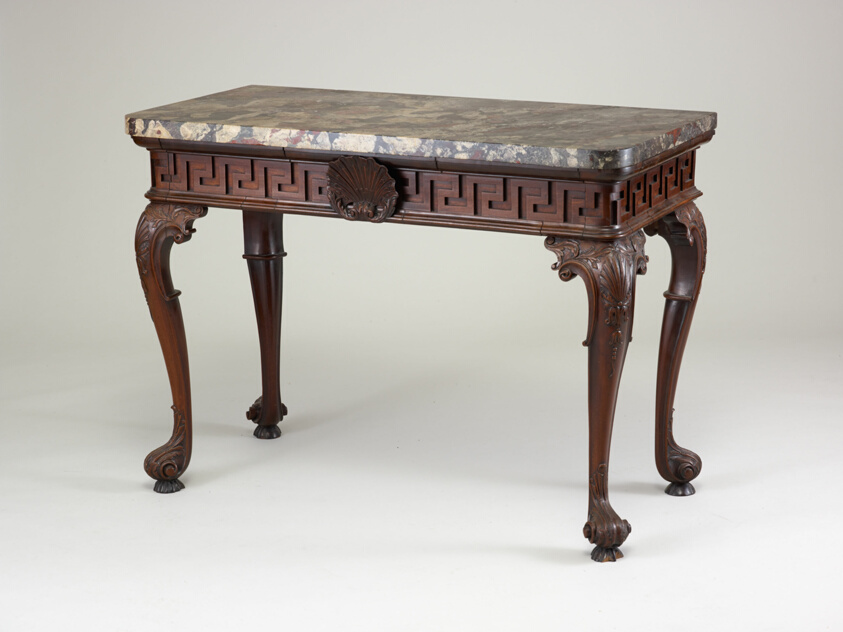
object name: Furniture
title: Side Table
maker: England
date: c. 1745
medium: Mahogany table with marble top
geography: England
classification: table; furniture; european decorative arts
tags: furniture